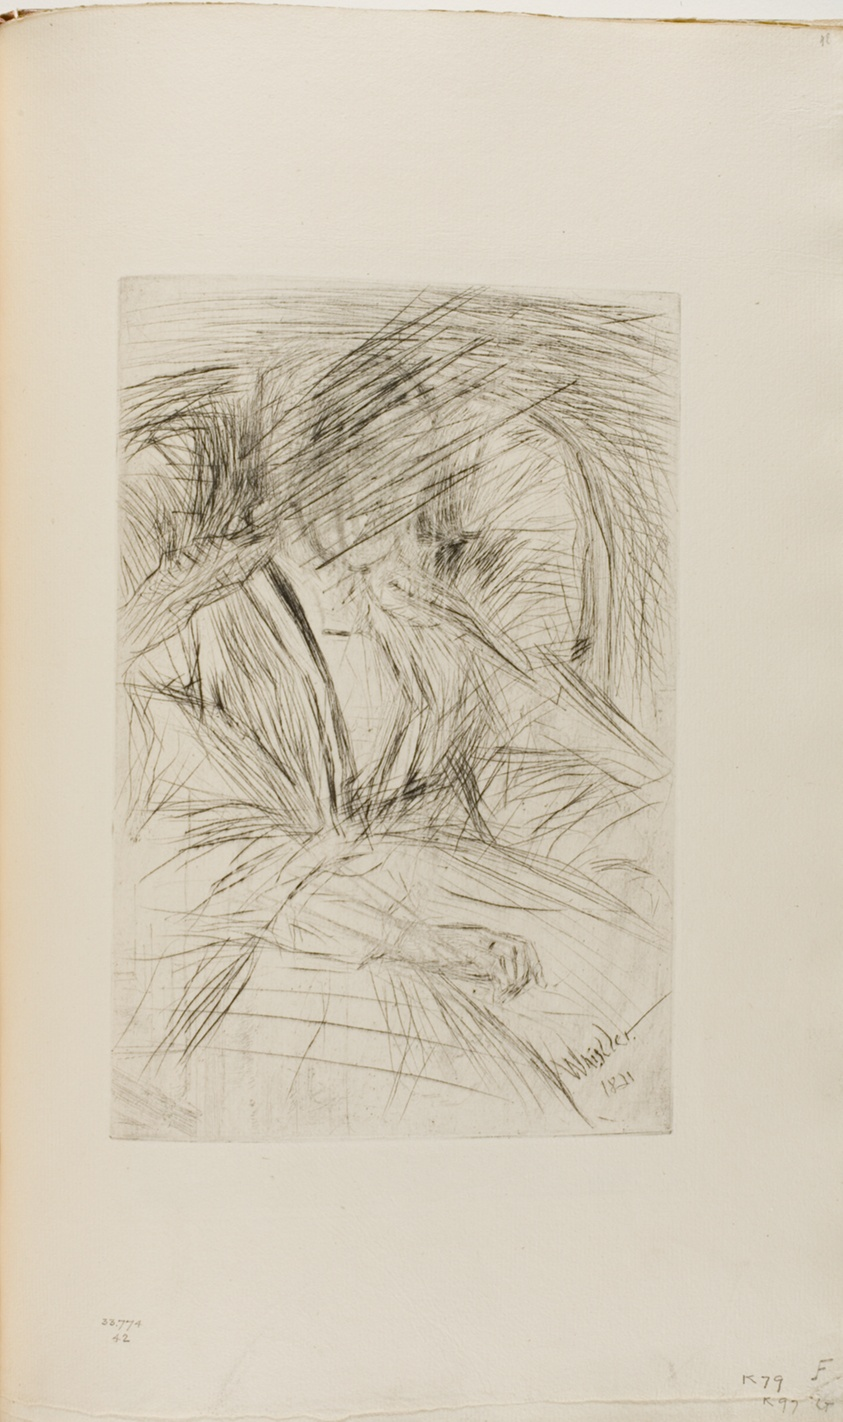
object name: Print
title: Lady in an armchair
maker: James McNeill Whistler (American, 1834-1903)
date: 1861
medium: Drypoint, with drypoint and scraped cancellation, in black ink on ivory laid paper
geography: United States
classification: drypoint; prints and drawing; book; print; paper